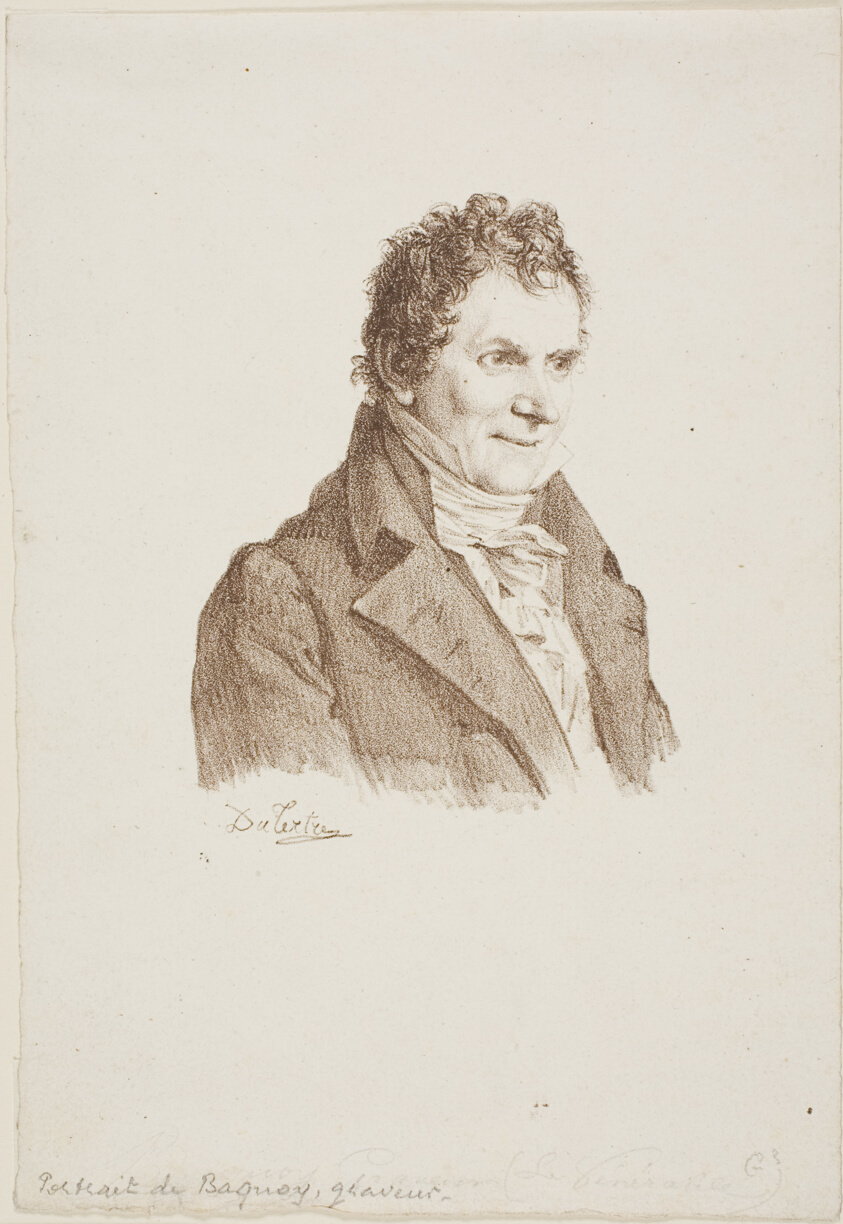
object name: Print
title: Portrait of the Engraver Baquoy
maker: André Dutertre (French, 1753-1842)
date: c. 1820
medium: Lithograph in dark brown on ivory wove paper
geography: France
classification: lithograph; print; prints and drawing